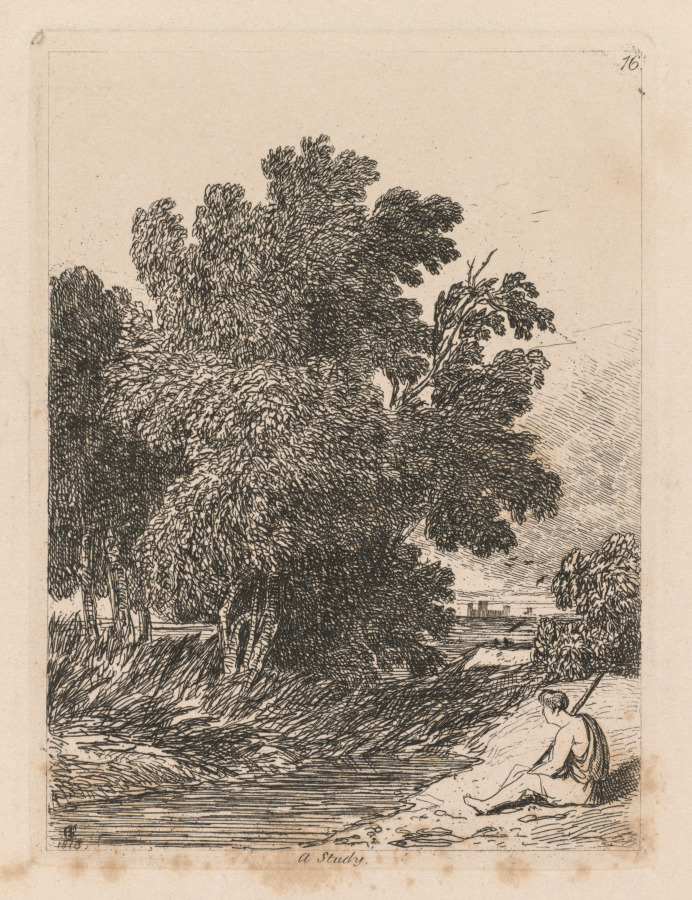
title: Liber Studiorum: Plate 16, A Study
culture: England, 19th century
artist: John Sell Cotman (British, 1782–1842)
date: 1838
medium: softground etching, from a bound volume containing 48 plates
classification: Bound Volume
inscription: In plate, within image, upper right: 16; in plate, lower left, within image: 1813; in plate, below image: A Study